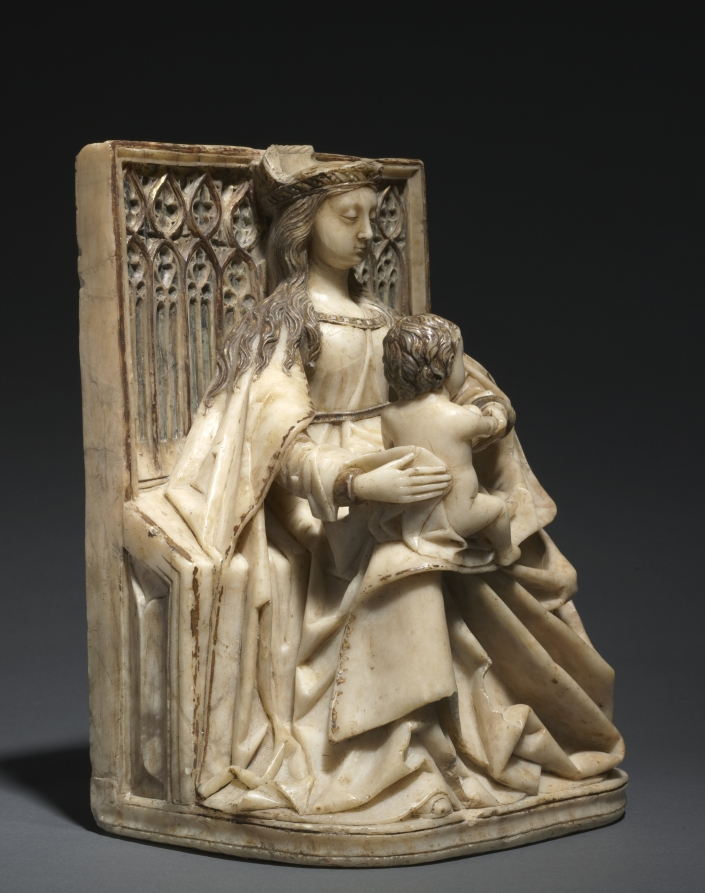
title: Enthroned Virgin and Child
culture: Spain, Burgos, 15th century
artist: Gil de Siloé (Spanish, active c. 1475–1505)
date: c. 1480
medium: alabaster with traces of gilding and polychromy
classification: Sculpture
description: The seated Virgin Mary with Christ is one of the most popular themes in Christian art of the Middle Ages. Alabaster was an ideal material to depict the fleshiness of Jesus, the lush folds of Mary’s cloak, and the fine details of the throne and gown. Christ is reaching for something in his mother’s hand that is now unrecognizable because alabaster tends to break or wear away quickly. It may have been a book or a piece of fruit. Given its small size, it is likely that this sculpture was intended for private use.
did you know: This sculpture was possibly made for Queen Isabella, the Spanish ruler who sponsored Christopher Columbus.